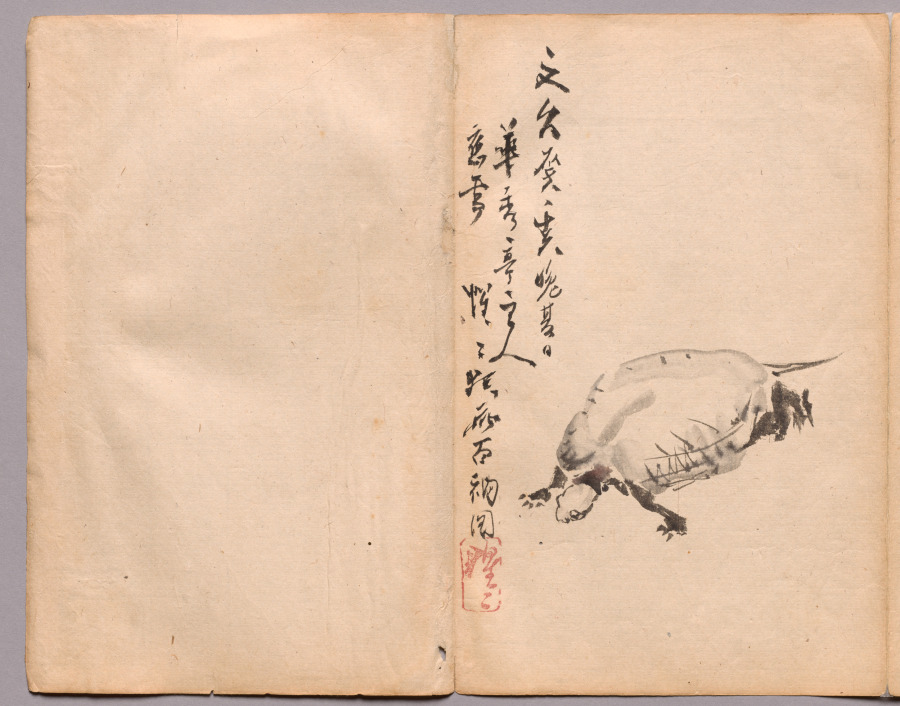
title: Tortoise from Sketch Album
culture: Japan, Edo period (1615–1868) to Meiji period (1868–1912)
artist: Kawanabe Kyōsai (Japanese, 1831–1889)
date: mid- late 1800s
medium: Accordion-style book of 26 double-leaves; ink and color on paper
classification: Bound Volume